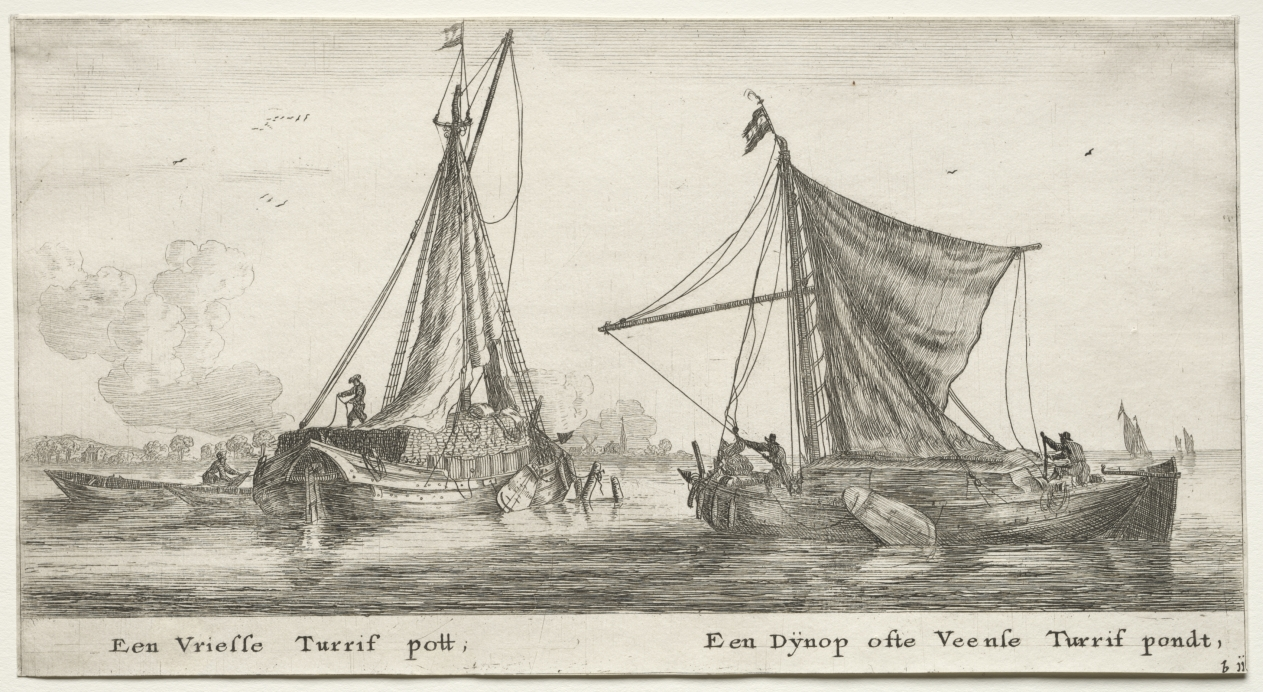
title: Various Ships and Views of Amsterdam (Verscheÿde Schepen en Gesichten van Amstelredam), Part II: A Frisian Peat Barge. The Dÿnop, near the Veensche Peat Pond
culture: Netherlands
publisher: Clement de Jonghe (Dutch, 1579–1679)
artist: Reinier Nooms, called Zeeman (Dutch, c. 1623–1664)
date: 1652–54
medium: etching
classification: Print